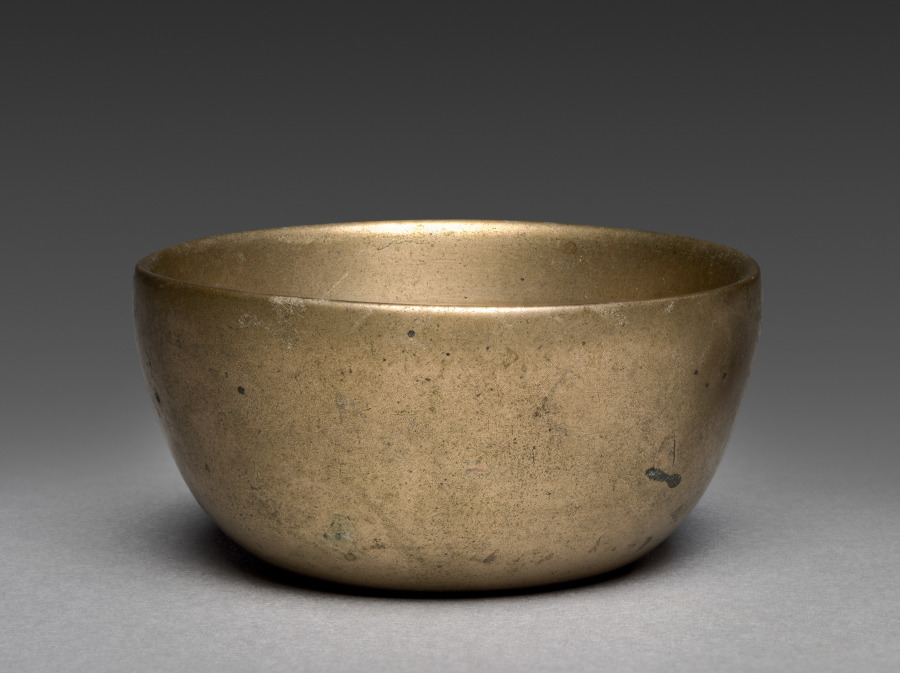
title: Wine Cup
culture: North Korea, Yochon, unassigned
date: unassigned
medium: brass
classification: Metalwork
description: In ancestor veneration rituals, deceased parents or ancestors are sanctified as spirits who are believed to oversee their descendants. Three times a year, once at the lunar new year, once at the person’s death date, and once at the time of the mid-autumn festival, food would be placed on the table for the ancestors, including fruits, rice, meat, and rice wine. During these ceremonies the worshipers’ attitude was as reverential toward the objects meant to embody the ancestors’ spirits as that toward a living parent. This pair of brass cups may have been used for ancestral rituals to contain rice wine.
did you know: This pair of bronze cups may have been used in family rituals such as ancestral worship ceremonies.